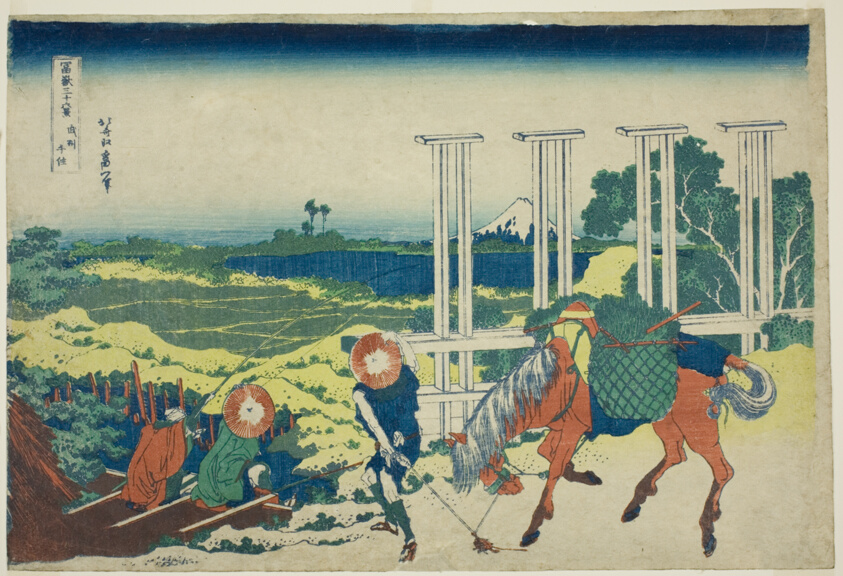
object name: Print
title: Senju Musashi Province (Bushu Senju), from the series "Thirty-six Views of Mount Fuji (Fugaku sanjurokkei)"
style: Japanese (culture or style)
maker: Katsushika Hokusai 葛飾 北斎; Japanese, 1760-1849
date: c. 1830/33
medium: Color woodblock print; oban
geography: Japan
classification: woodblock print; print; asian art